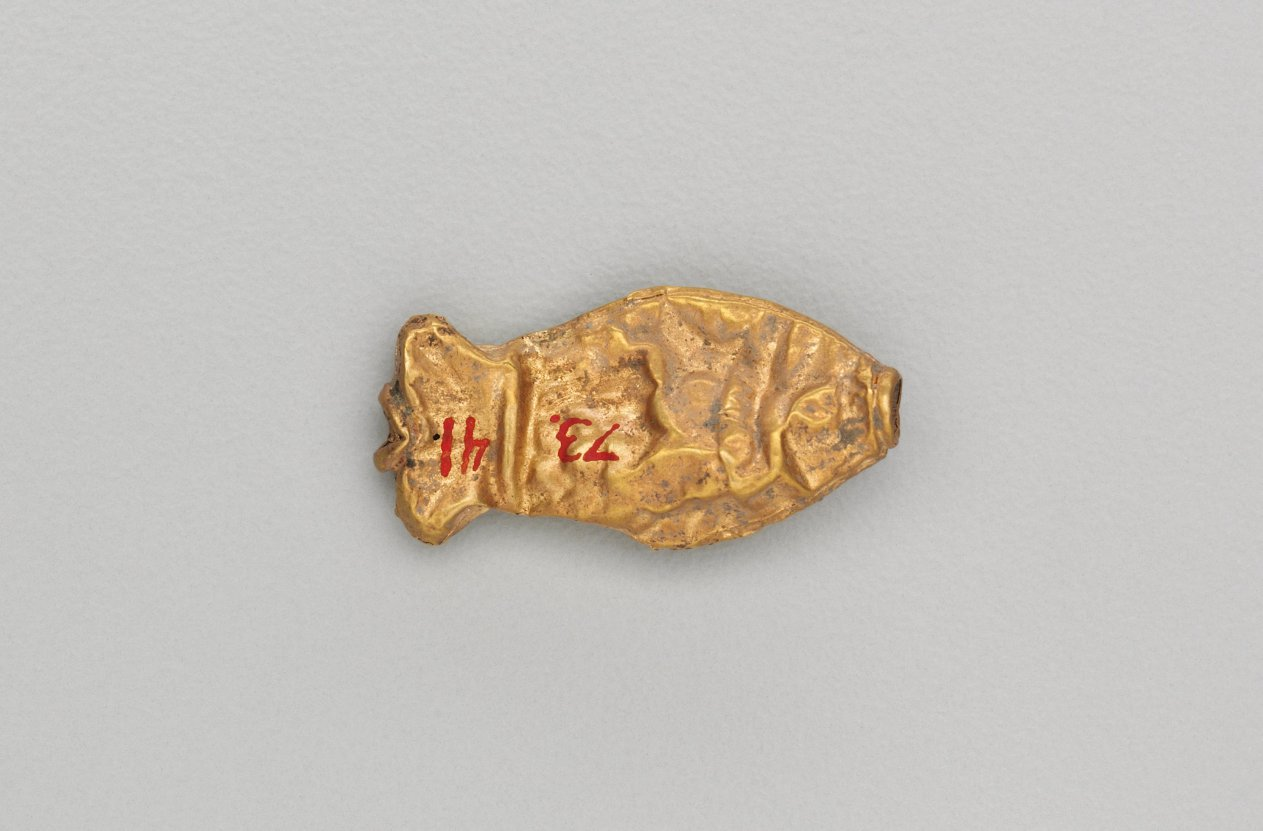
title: Necklace Bead in the Form of a Fish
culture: India, Shunga period (185–78 BCE)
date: 185–72 BCE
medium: gold repoussé with granulation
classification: Jewelry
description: Jewelry in ancient India often consisted of elements associated with water, such as fish and other aquatic plants and animals. Since water is essential for life, imagery that connotes water is life-affirming, or auspicious, and therefore appropriate adornment.